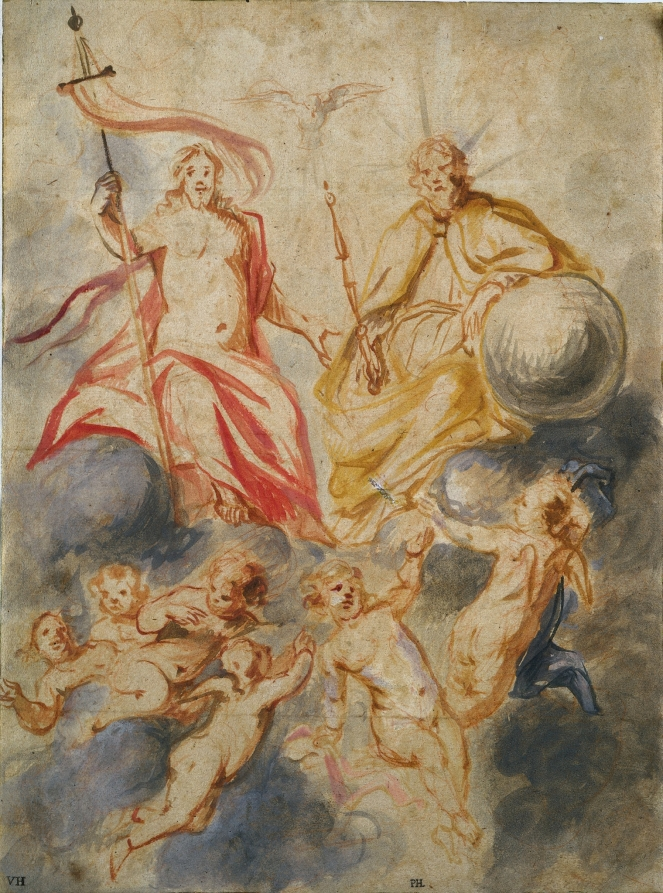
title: Holy Trinity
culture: Flanders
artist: Theodor van Thulden (Flemish, 1606–1669)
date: c. 1647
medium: watercolor and gouache over red chalk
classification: Drawing